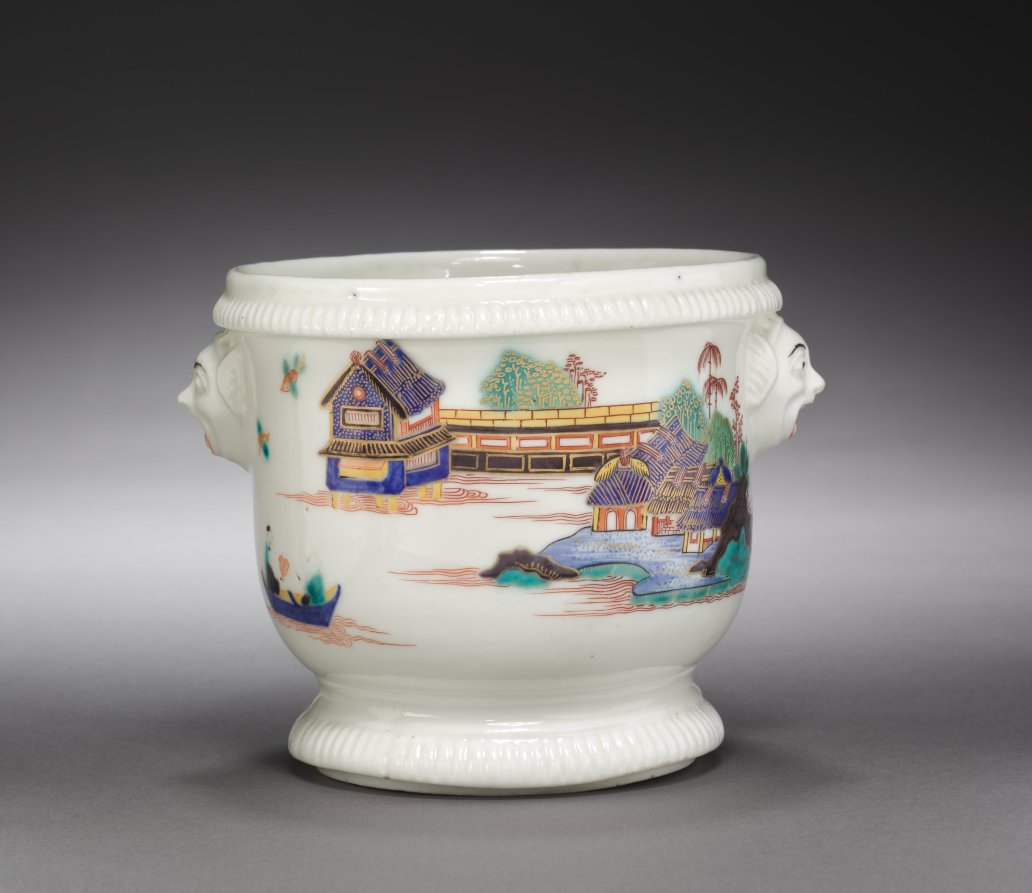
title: Bottle Cooler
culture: France, Saint Cloud, 18th century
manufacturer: Saint Cloud Porcelain Factory (French)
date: c. 1725– 1735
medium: soft-paste porcelain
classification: Ceramic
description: The form of these cachepots is entirely typical of Saint-Cloud porcelain of about 1725. Their decoration, based upon Chinese porcelains of the so-called "famille-verte" type, is most unusual. Polychromed enamels were not often employed on Saint-Cloud porcelains, and figural scenes are very rare.